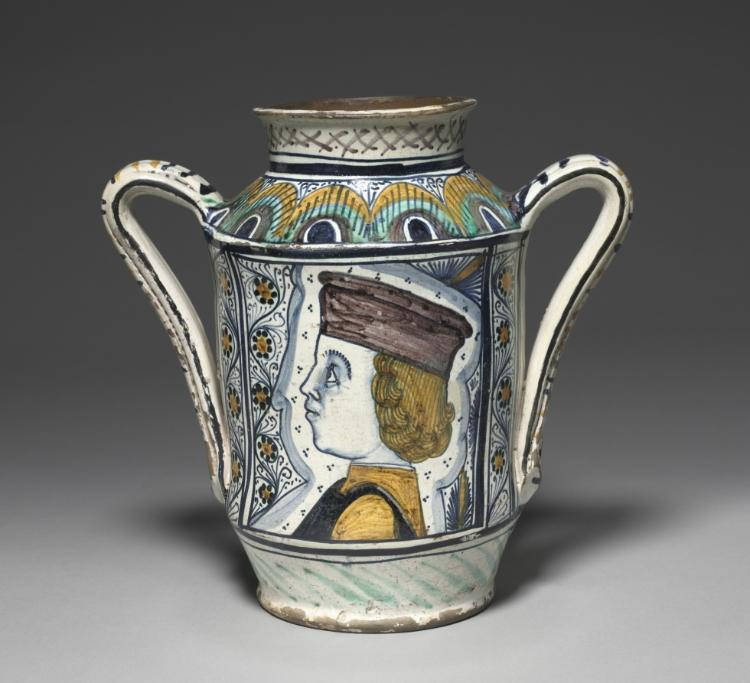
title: Pharmacy Jar (Albarello)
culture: Italy, Florentine region, Cafaggiolo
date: c. 1475–80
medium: tin-glazed earthenware (maiolica)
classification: Ceramic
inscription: in ribbon scroll on back: PENIAELFINE.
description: Storage jars that lined the shelves of Renaissance pharmacies often held medicinal herbs, spices, and ointments. Their shape made them easy to grasp while the flared lip allowed apothecaries to seal off the contents with parchment or cloth secured by a string. A scroll on the back of this vessel indicates that it may have once held a peony compound.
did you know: At various points in history, medicinal peony compounds have been prescribed for dizziness, weakness, hysteria, jaundice, and kidney stones.